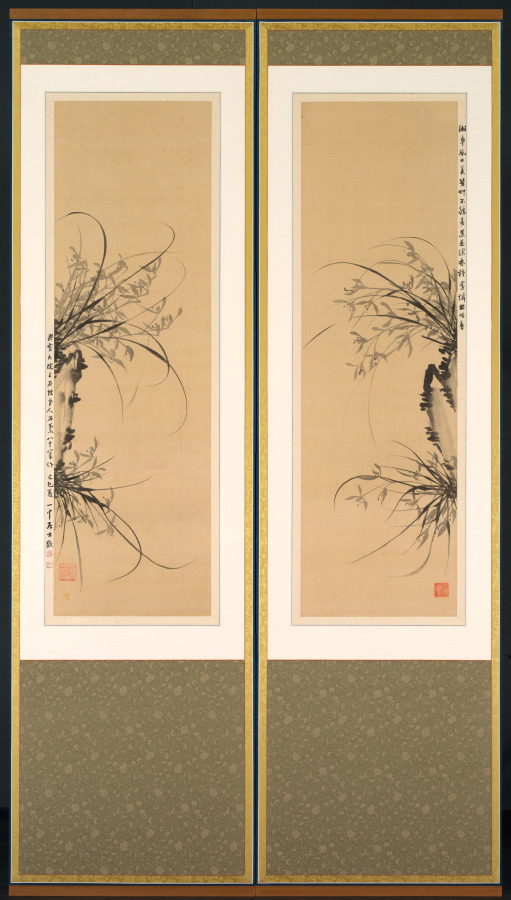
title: Orchids and Rocks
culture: Korea, Joseon dynasty (1392–1910)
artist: Yi Ha-eung (Korean, 1820–1898)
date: 1897–98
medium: Eight-panel folding screen; ink on silk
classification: Painting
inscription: Translation: [I] painted for the high minister Yangwon. [I] humbly request your corrections and advice [on my painting]. [By] an eighty-year old gentleman of rocks.)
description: Yi Ha-eung (1820−1898), the artist of this eight-panel folding screen, was one of the most influential men in late 19th-century Korea. Acting as the regent for his son, King Gojong (1852−1919), who ascended the throne at the age of thirteen, Yi ruled Korea from 1866 to 1873. In addition to his illustrious political career, Yi was also recognized as one of the most celebrated artists who led the revival of literati art in late 19th-century Korean art. In particular, he was recognized as the master of orchids, one of the “Four Gentlemen” (plum, orchid, chrysanthemum, and bamboo) themes. Solely relying on monochrome ink, Yi depicted the curvilinear silhouettes of cymbidium orchid leaves dramatically hanging down from cliffs. Growing in wilderness and redolent with fragrance, orchids were often associated with the perseverance of principled gentlemen, and thus became one of the most popular subjects of scholar-artists' paintings.On the upper right corner of the far left panel, Yi wrote a short inscription stating that he painted the work at the age of 80.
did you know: The artist of this elegant painting is the formidable politician Yi Ha-eung (1820–1898), who is known for a seclusion policy that aimed to protect Korea and its sovereignty from foreign influences.